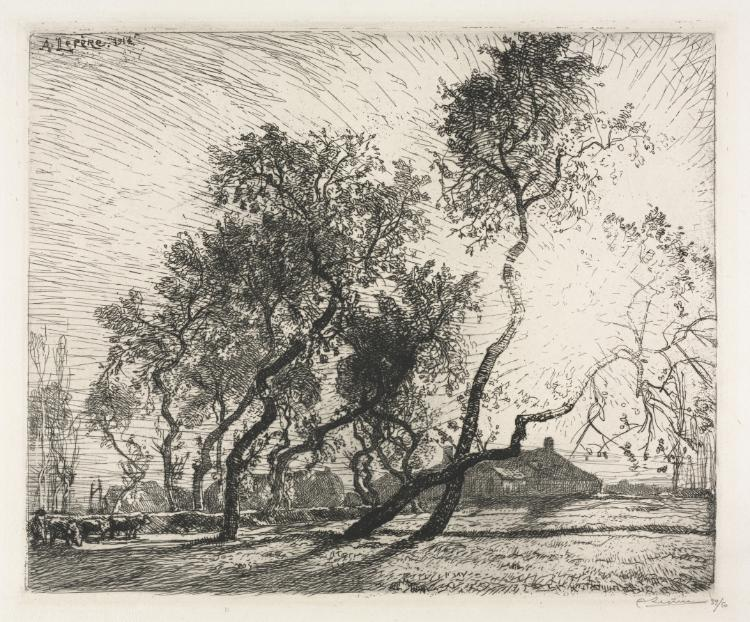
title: Farm with Poplar Trees of Holland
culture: France, 20th century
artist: Auguste Louis Lepère (French, 1849–1918)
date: 1914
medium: etching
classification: Print